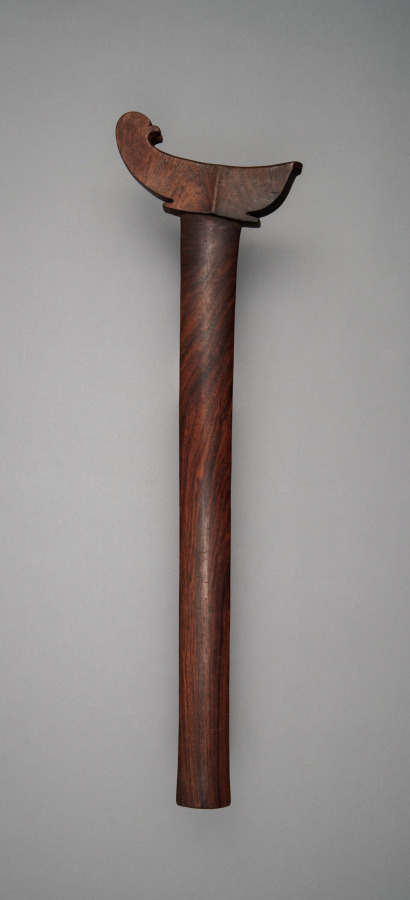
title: Scabbard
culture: Philippines, Mindanao, most likely Sulu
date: before 1916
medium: Wood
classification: Arms and Armor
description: This wooden scabbard is carved from a single piece of hardwood. Its boat-shaped upper section is designed to accommodate the hilt of a kalis (kris) sword. The surface is smooth and undecorated, highlighting the natural grain of the wood.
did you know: Narra wood (sometimes called “Philippine mahogany”) is costly and difficult to carve.